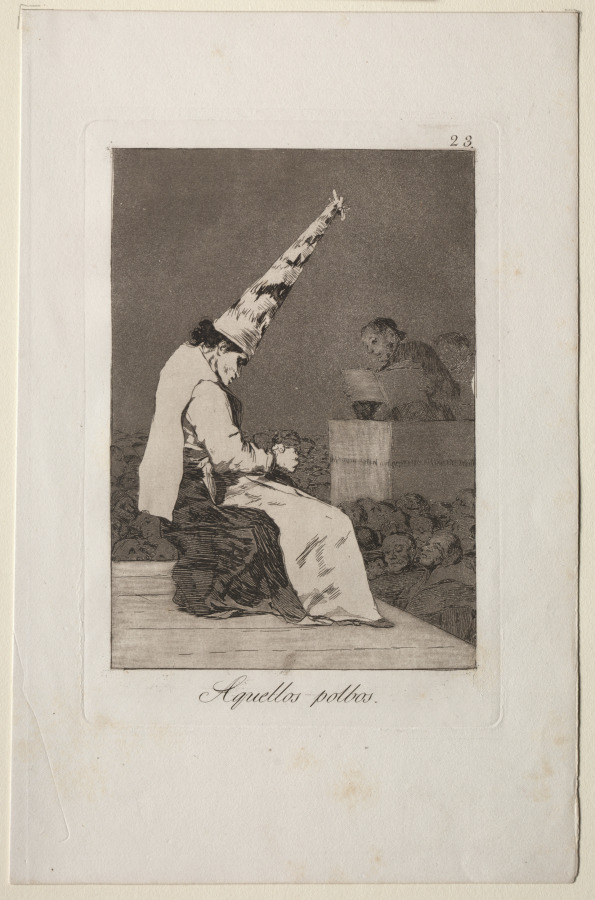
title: Those Specks of Dust, Plate 23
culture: Spain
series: Los Caprichos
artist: Francisco de Goya (Spanish, 1746–1828)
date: 1799 (printed c. 1855)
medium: etching and aquatint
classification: Print